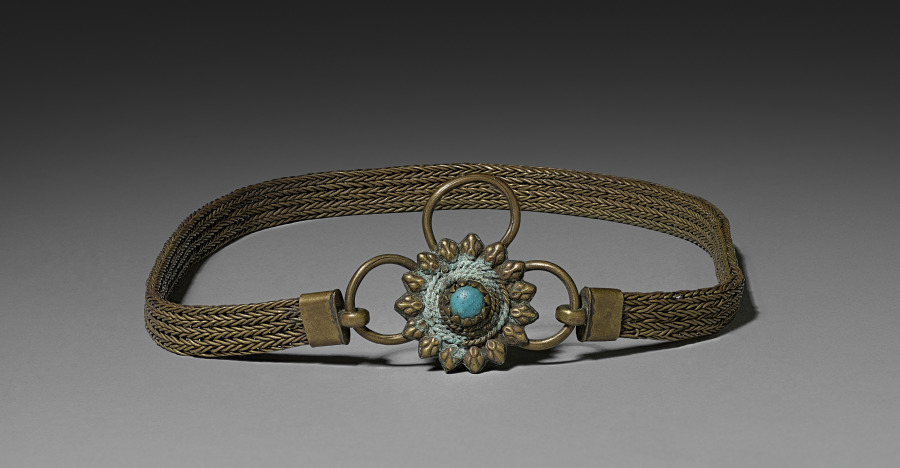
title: Chain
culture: India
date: 1800s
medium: brass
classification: Jewelry